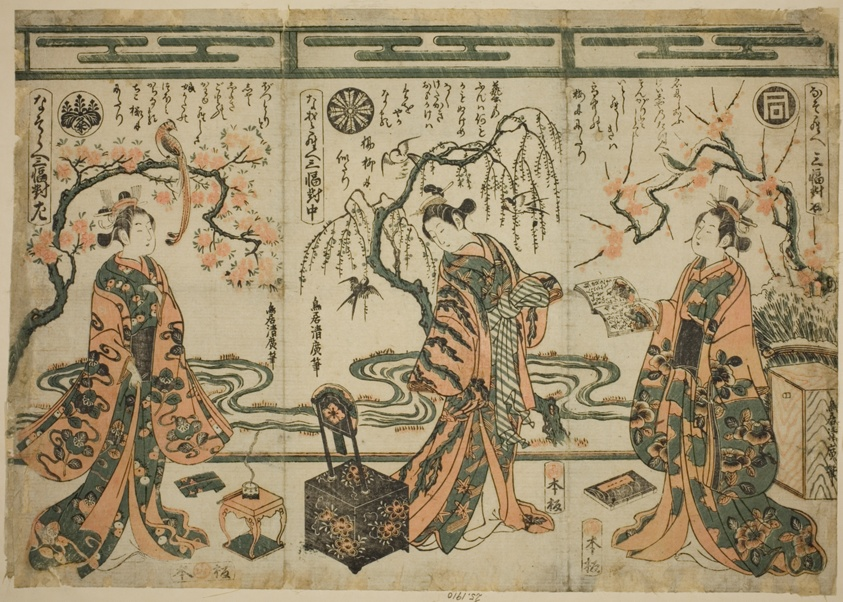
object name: Print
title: The Actors Sanogawa Ichimatsu (right), Nakamura Tomijuro (center), and Nakamura Kumetaro (left), from A Comparison - Set of Three (Nazorae Sanpukutsui)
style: Japanese (culture or style)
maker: Torii Kiyohiro (Japanese, active c. 1737-76)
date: c. 1753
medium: Color woodblock print; uncut hosoban triptych, benizuri-e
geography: Japan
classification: woodblock print; print; asian art